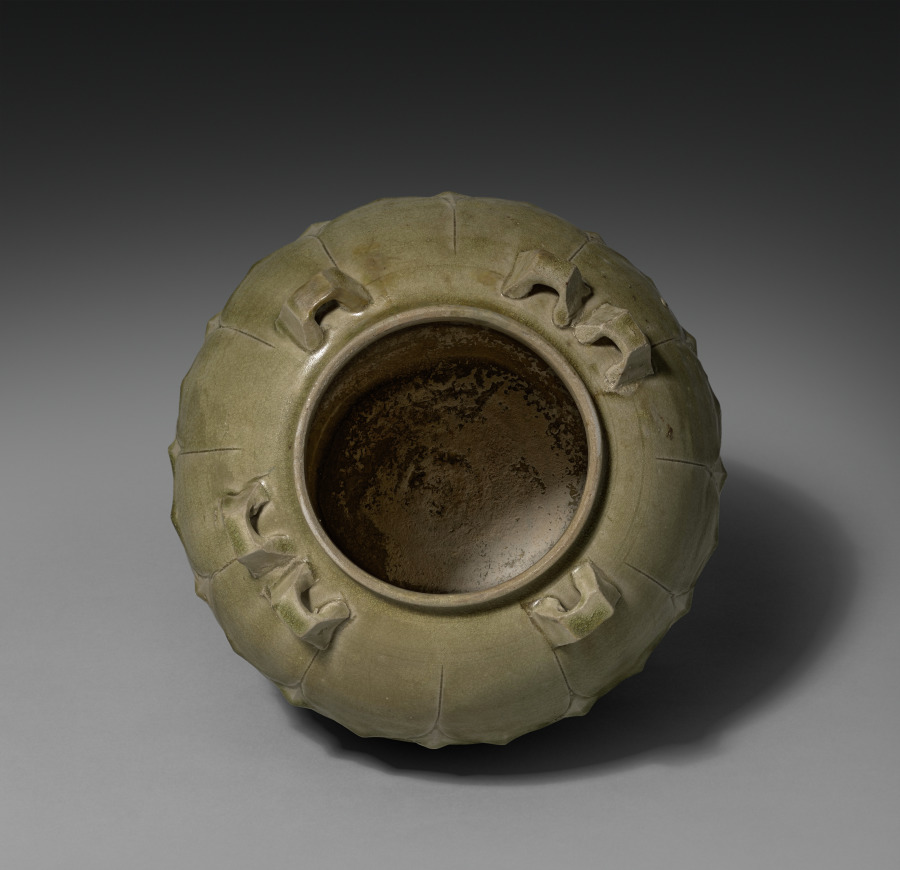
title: Covered Jar with Carved Lotus Petals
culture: China, Northern Dynasties period (386-581)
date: 386–581 CE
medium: Glazed stoneware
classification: Ceramic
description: This jar still has its original cover, which is rare among surviving examples. Its missing knob most likely had the shape of a lotus bud. Beautifully carved lotus petals cover the vessel’s shoulder and lid under a translucent green glaze. In Buddhism, the lotus is a flower symbolizing purity and detachment from worldly affairs; its presence suggests that this vessel was meant to be used in a religious context. The well-crafted double loop handles may have held a silk cloth or other textile that would have been folded over the lid to keep it in place. This aesthetic prefigures the celebrated green celadons in adjacent regions.